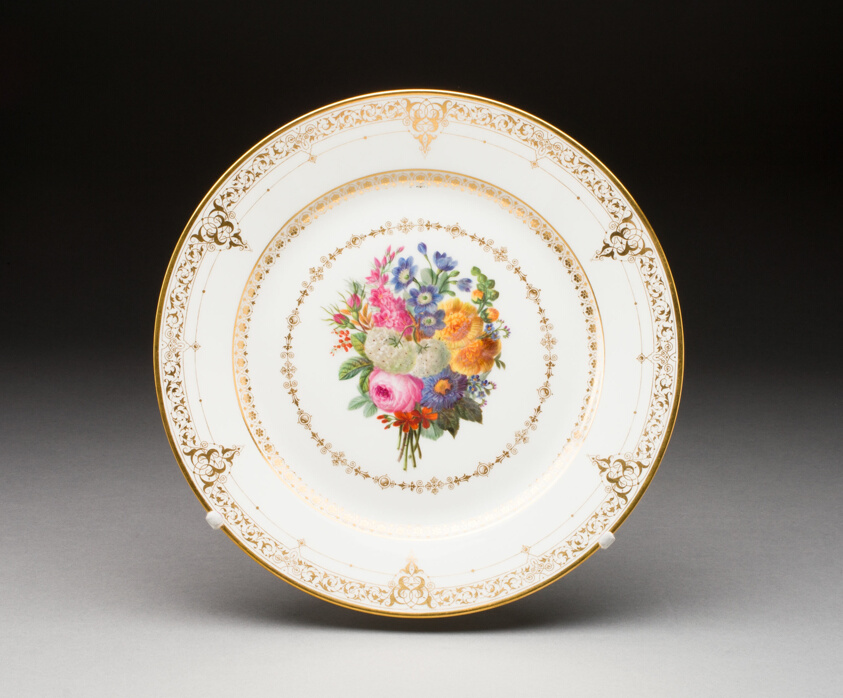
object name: Ceramics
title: Plate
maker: Sèvres Porcelain Manufactory; French, founded 1740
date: 1845/46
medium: Hard-paste porcelain with polychrome enamels and gilding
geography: Sèvres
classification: plate (general, dish); tableware; dish (vessel); porcelain; european decorative arts; ceramics